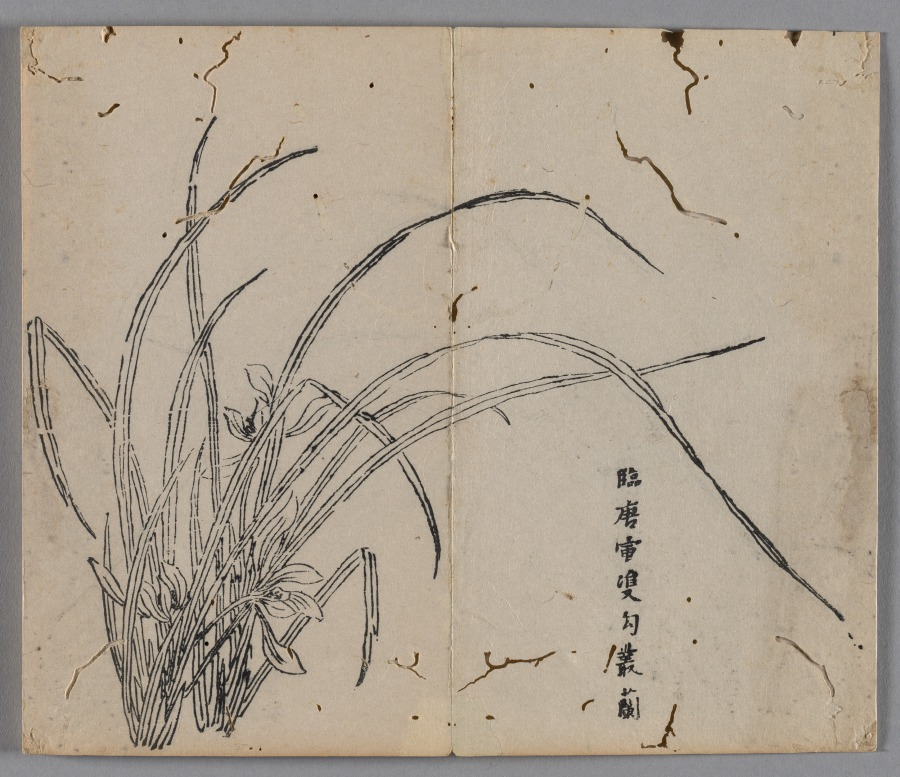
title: Ten Bamboo Studio Painting and Calligraphy Handbook (Shizhuzhai shuhua pu): Orchids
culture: China, Qing dynasty (1644-1911)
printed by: Hu Zhengyan (Chinese, c. 1584–1674)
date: 1633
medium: Woodblock-printed book; ink and colors on paper; first edition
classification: Print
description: Color printing reached a level of perfection in the early 1600s, as seen in this Ten Bamboo Studio Collection of Calligraphy and Painting and the Mustard Seed Garden Manual of Painting (printed 1679 and 1701). The painterly quality, precision in registering (aligning) the woodblocks, and harmonious colors made them the most successful color print editions in Chinese history. Both editions were printed and compiled in Nanjing, spread nationwide, and had a great impact on the arts in Japan and Korea.